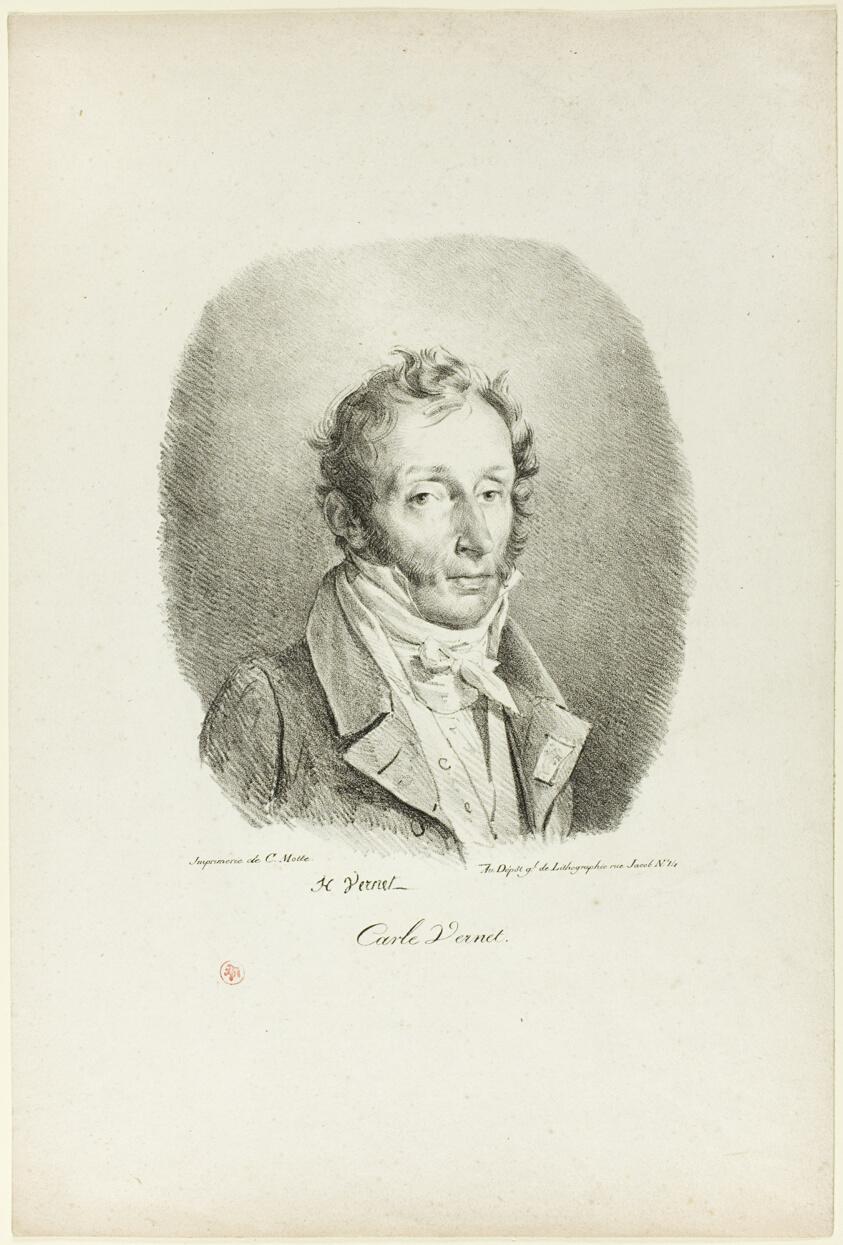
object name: Print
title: Portrait of Carle Vernet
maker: Horace Vernet (French, 1789-1863)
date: 1817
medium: Lithograph in black on ivory wove paper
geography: France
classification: lithograph; print; prints and drawing